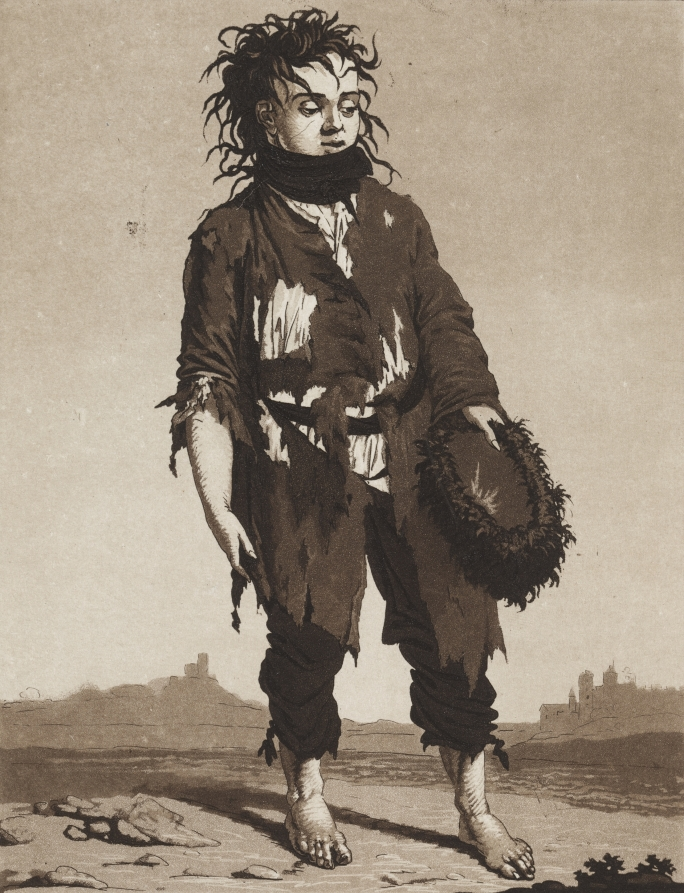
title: The Young Beggars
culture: Germany, late 18th-early 19th century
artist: Karl Ludwig Bernhard Buchhorn (German, 1770–1856)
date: c. 1800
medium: aquatint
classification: Print